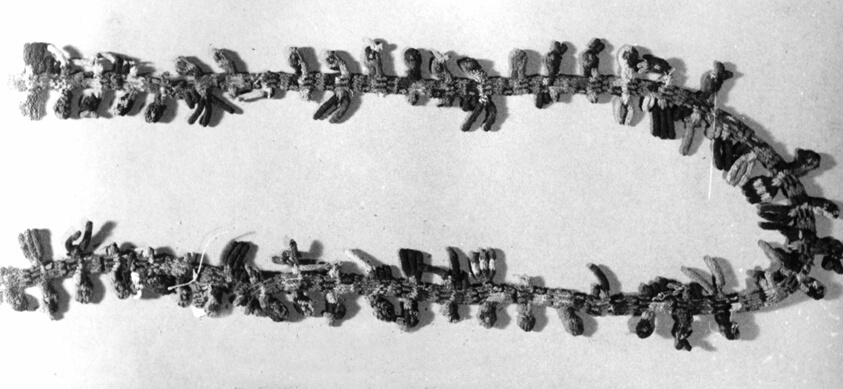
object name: Textile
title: Fragment (Border)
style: nazca, andean, andes, Pre-Columbian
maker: Nazca; Nazca Valley, south coast, Peru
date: 100 B.C./A.D. 200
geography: Peru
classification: textile; weaving